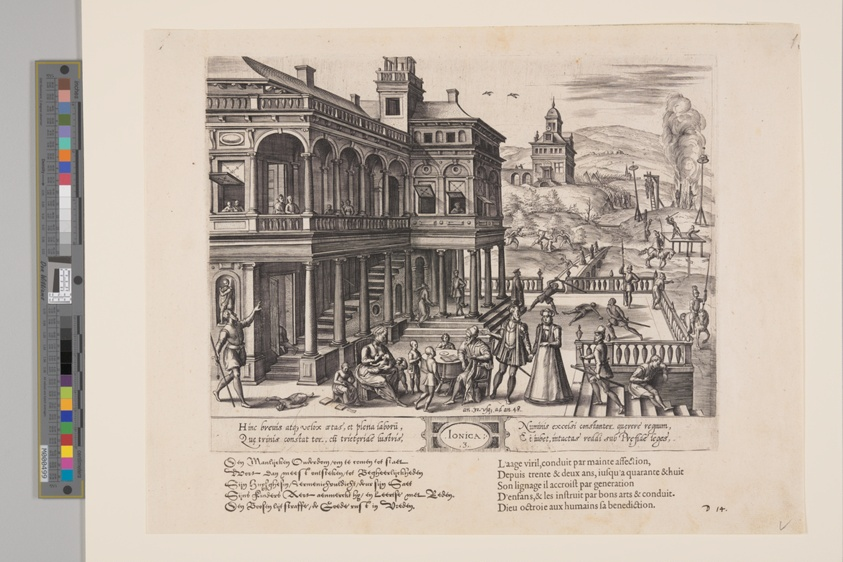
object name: Print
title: Ionica, from Theatrum Vitae Humanae (The Ages of Man)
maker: Jan Wierix (Flemish, 1549–c. 1618)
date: 1577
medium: Engraving on ivory laid paper, with letterpress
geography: Flanders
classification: engraving; paper; print; prints and drawing